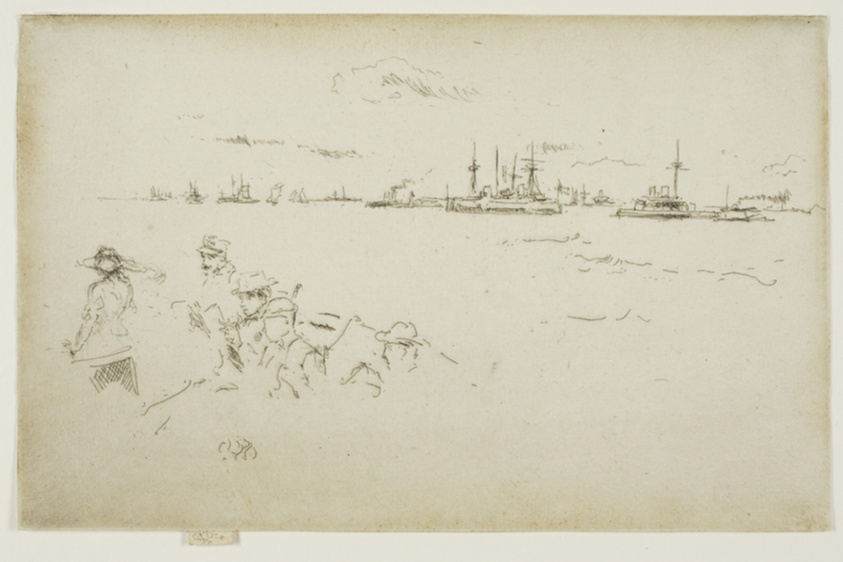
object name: Print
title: The Fleet: Monitors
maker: James McNeill Whistler (American, 1834-1903)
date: 1887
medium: Etching and drypoint with foul biting in black ink on cream laid paper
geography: United States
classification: etching; foul biting; print; prints and drawing; drypoint; paper